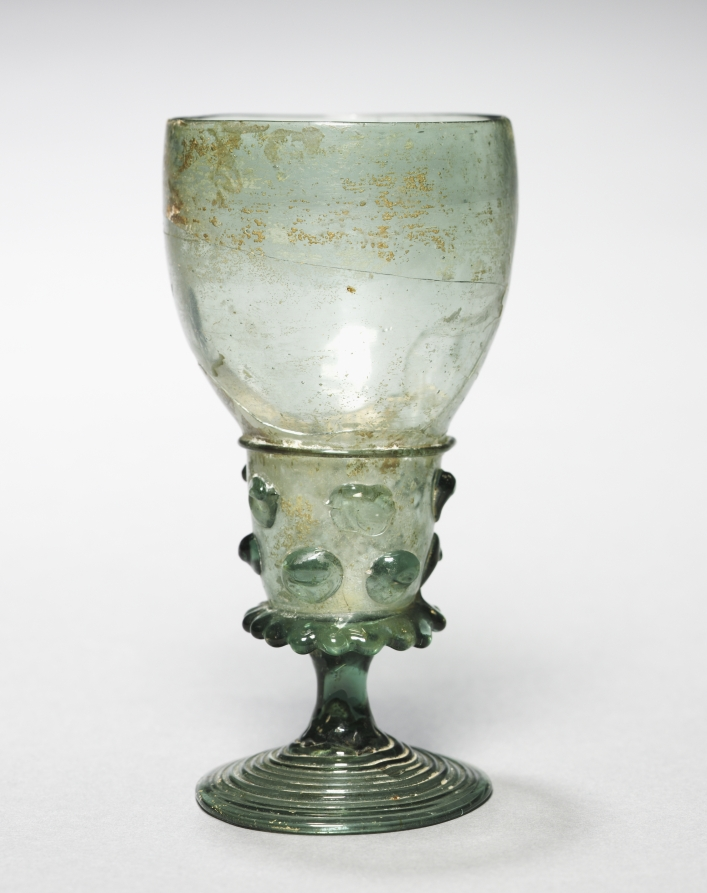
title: Goblet (Berkemeyer)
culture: Germany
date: c. 1525–50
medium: green glass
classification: Glass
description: Green goblets were frequently used for white wine, since the color was thought to enhance the wine’s golden shade. This goblet ornamented with prunts, or glass blobs, has a funnel-shaped mouth and was typical of German and Netherlandish manufacture in the 1500s and 1600s. The green color, caused by iron impurities in the local sand, is typical of Waldglas (“forest glass” in German), made in the forests of Central Europe.